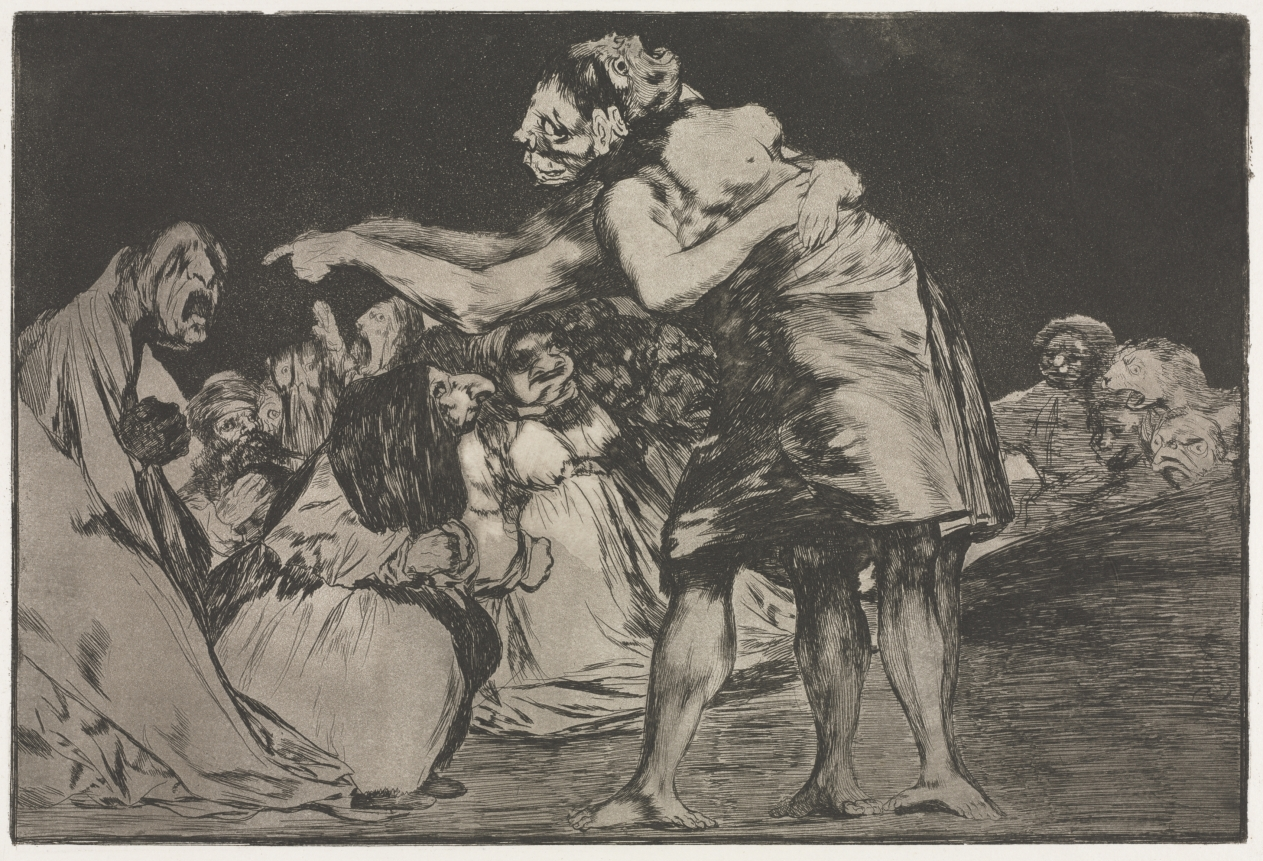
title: The Proverbs: Matrimonial Folly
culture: Spain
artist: Francisco de Goya (Spanish, 1746–1828)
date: 1864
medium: etching and aquatint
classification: Print